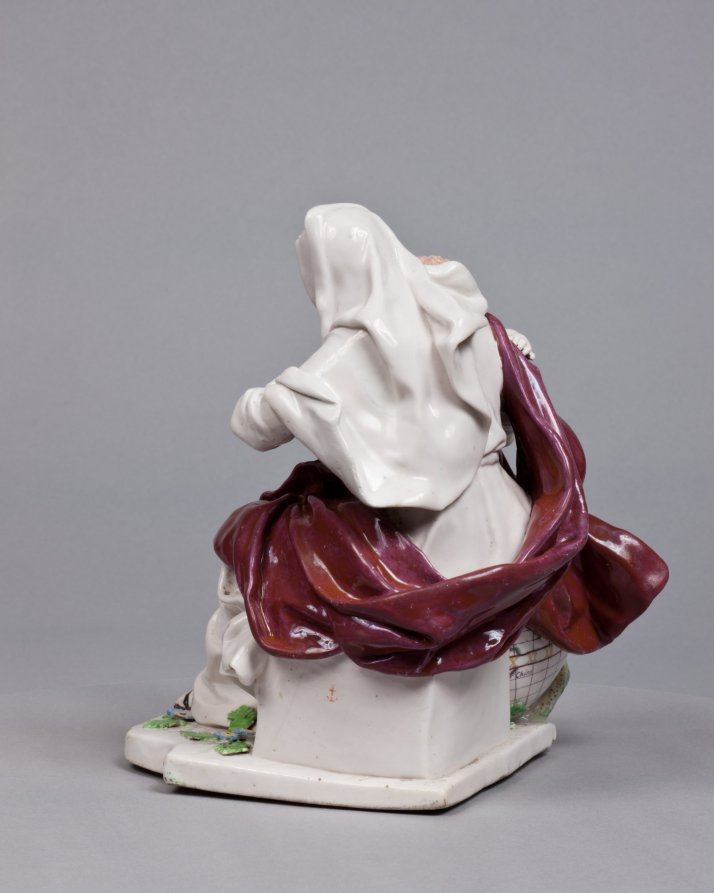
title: Madonna and Child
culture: England, Chelsea, 18th century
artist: Chelsea Porcelain Factory (Britain, London, 1745–84)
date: c. 1755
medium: porcelain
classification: Ceramic